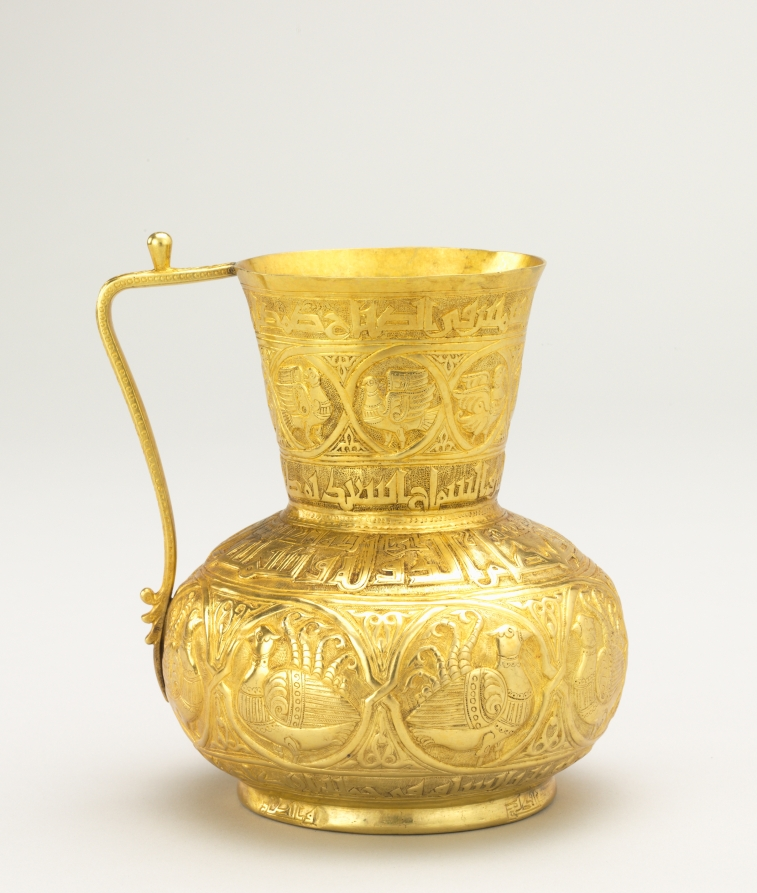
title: Jug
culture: Iran or Iraq, Baghdad, Buyid Period, reign of Samsam al-Dawla (985-998 AD)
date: late 900s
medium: gold with repoussé and chased and engraved decoration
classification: Metalwork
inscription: The inscription bands contain Arabic poetry which translates, in part: "You are the image of the full moon at night, the first gleam of sun on the horizon of the morning. You are a sword in the times of war, a beneficent rain in times of peace...your sword cuts the necks of Buyid enemies in great quantities...Glory and prosperity to the just king Samsam al-Dawla...May God lengthen your reign!"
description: This jug is one of the rare surviving Islamic vessels made entirely of precious metal. Its inscription bands contain Arabic poetry that translates, in part: "You are the image of the full moon at night, the first gleam of sun on the horizon of the morning. You are a sword in the times of war, a beneficent rain in times of peace . . . your sword cuts the necks of Buyid enemies in great quantities . . . Glory and prosperity to the just king Samsam al-Dawla . . . May God lengthen your reign!"